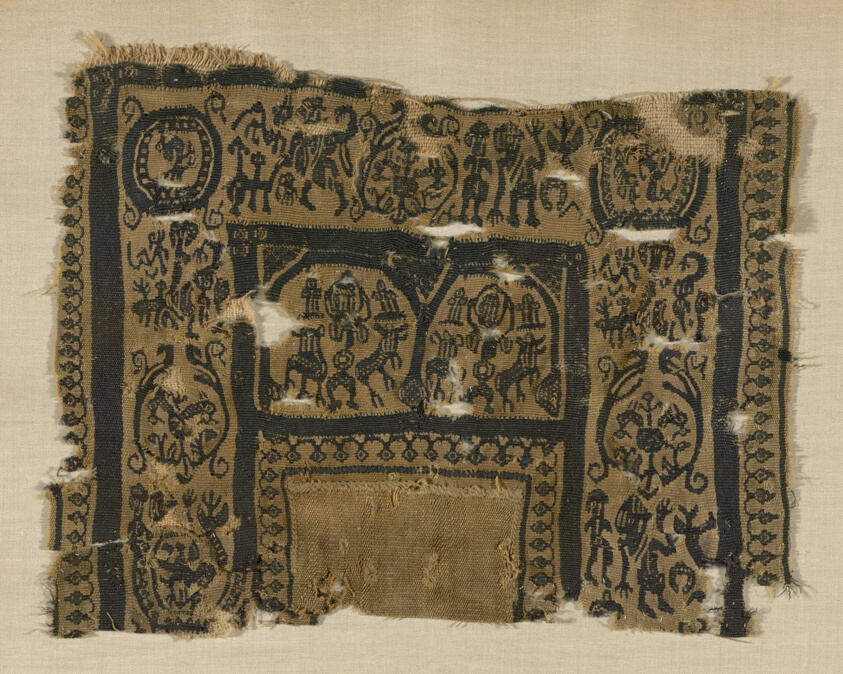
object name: Textile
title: Yoke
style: roman period (egyptian)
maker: Egypt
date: Roman period (30 B.C.– 641 A.D.), 5th/6th century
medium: Wool, slit tapestry weave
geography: Egypt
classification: textile; weaving